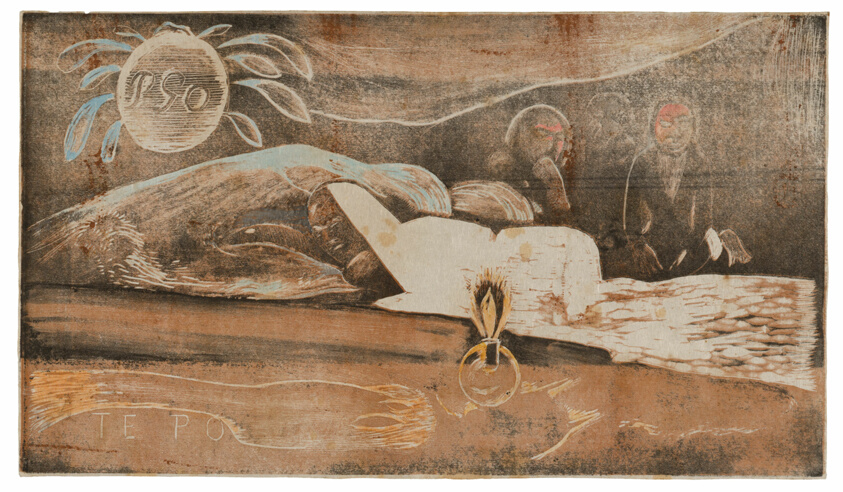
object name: Print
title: Te po (The Night) from the Noa Noa Suite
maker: Paul Gauguin (French, 1848-1903)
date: 1893/94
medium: Wood-block print, printed twice in brown and black inks, with selective wiping, and hand-applied red, two tones of orange, yellow, two tones of blue, silver-gray, and black watercolor, on cream laid Japanese paper laid down on cream wove Japanese paper (a laminate made by the artist)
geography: France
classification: woodcut; print; prints and drawing